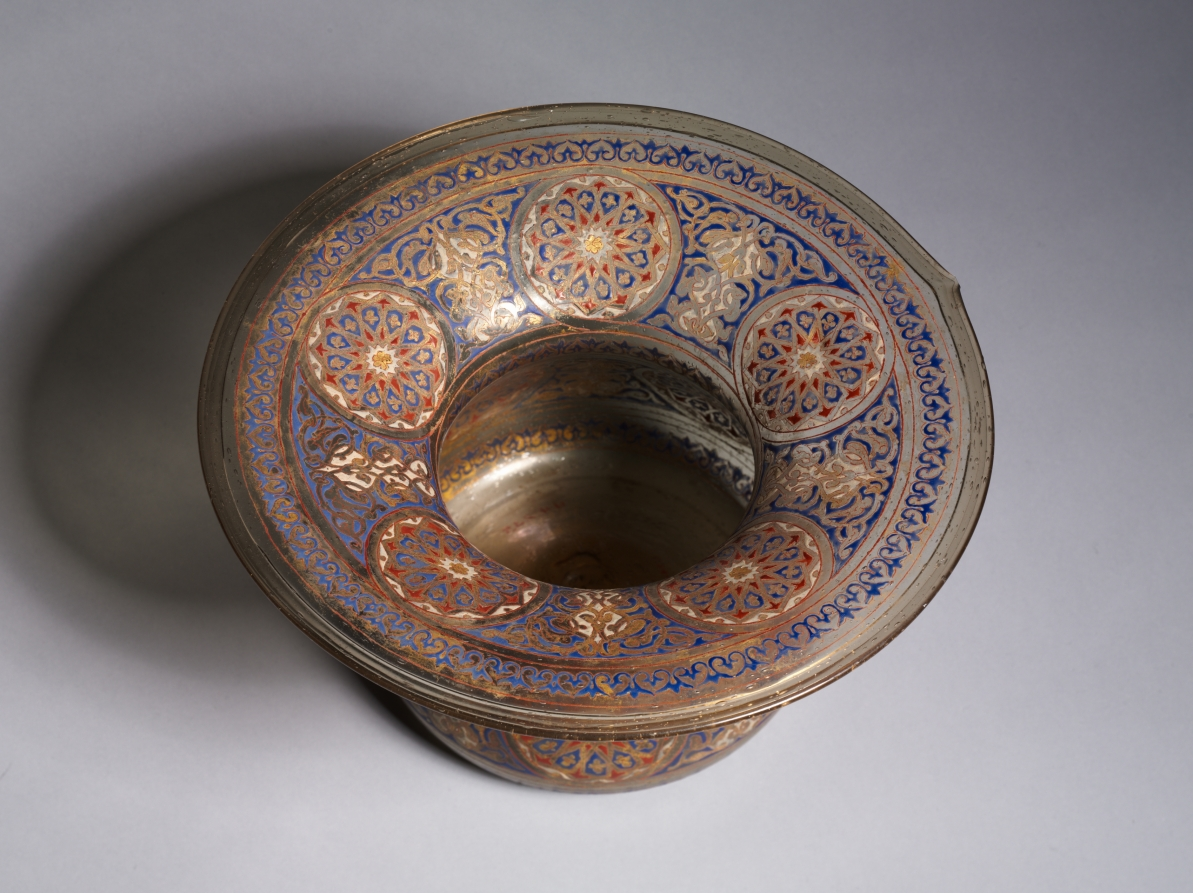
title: Ceremonial Spittoon or Basin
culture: Europe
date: late 1800s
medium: glass with enameled and gilded decoration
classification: Glass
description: This basin, as with the mosque lamp CMA 1981.10, is representative of reproductions of Mamluk glass that were prominent in the late 1800s in Europe during a period of resurgence of interest in Islamic art. At this time, collectors and artists revived the techniques of enameling and gilding that are hallmarks of Mamluk glass.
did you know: The intense enamel colors form striking star and leaf patterns.